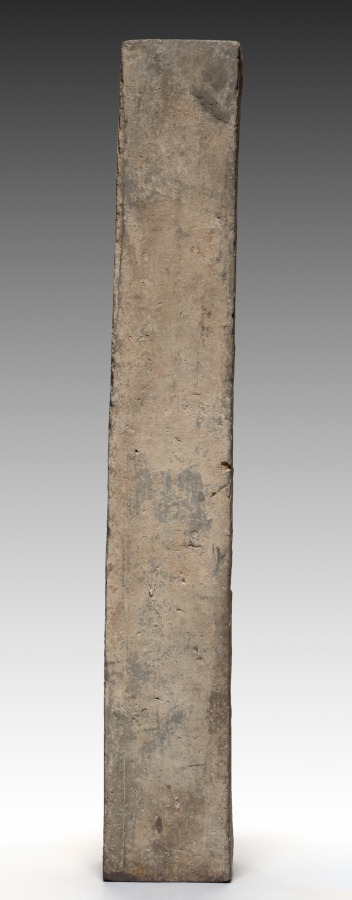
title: Hollow Tile: Lintel from Tomb-Chamber Doorway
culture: China, Han dynasty (202 BCE–220 CE)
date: 100–200 CE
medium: earthenware, die-stamped relief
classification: Ceramic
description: Striding tigers (top), racing horsemen (right column), and reverent officials (left column) are stamped into the surface of this underground portal to a tomb. The doorway preserves in stone the post-and-lintel structure, a basic element of Chinese wooden architecture. By the first century CE, a revolution in Chinese tomb construction and furnishing had taken place. Tombs lined with decorated bricks and tiles replace the earlier tombs constructed with only rammed-earth walls. Ceramic surrogates or models of stoves, houses, servants, and pets filled these more durable chambers, symbolically extending the creature comforts of this world into the world after death.